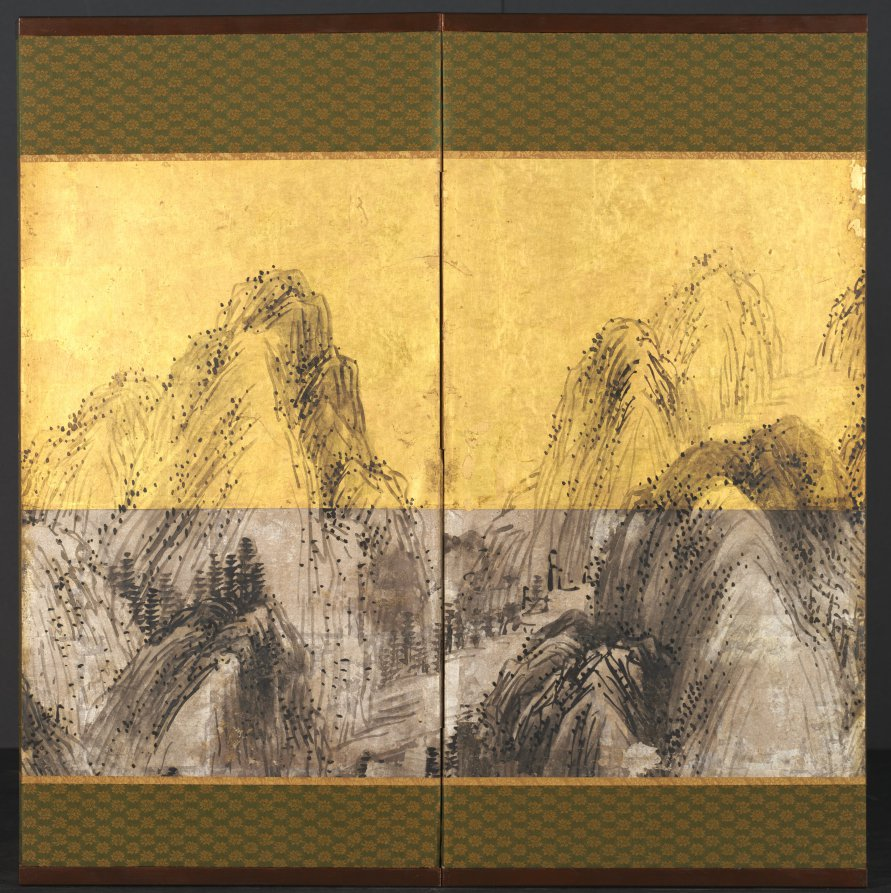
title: Seventy-Two Peaks Under the Blue Sky with Mount Furong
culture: Japan, Edo period (1615–1868)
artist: Matsumura Goshun (Japanese, 1752–1811)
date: 1785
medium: Eight-panel folding screen; ink with gold and silver foil on paper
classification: Painting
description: The low height of this folding screen suggests its use as a partition in a small tearoom. An inscription identifies the scene as the 72-peak Heng mountain range in Hunan, China, associated with Buddhist and Daoist traditions and celebrated in poetry. Special mention in the inscription is made of Mount Furong, one of the peaks in the range. Matsumura Goshun may have drawn inspiration from his teacher, Yosa Buson (与謝蕪村) (1716–1783), whose final work depicted the same mountain range.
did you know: By painting on silver and gold foil, Matsumura Goshun created an alluring surface and deep space in this surprisingly spare vista.